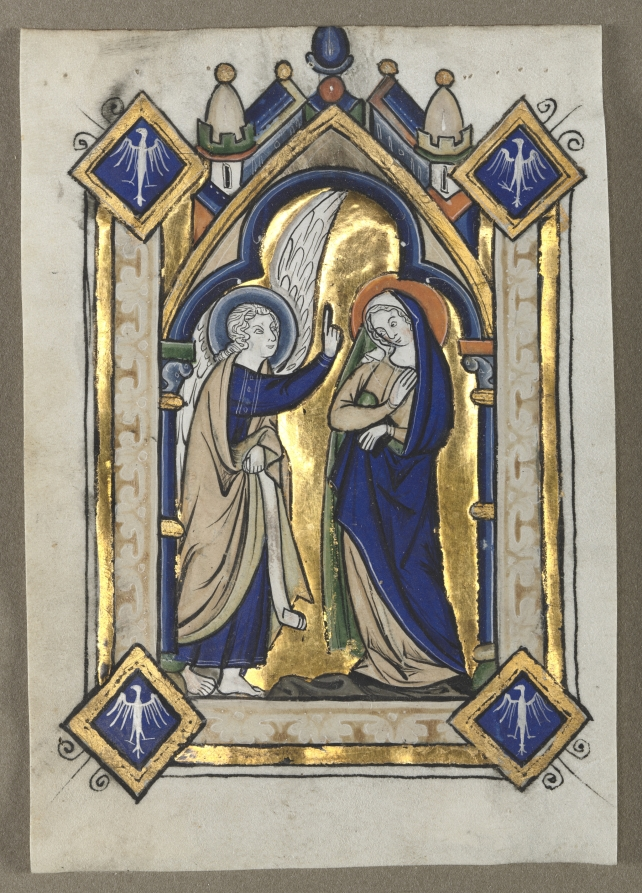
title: Leaf Excised from a Psalter: The Annunciation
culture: Flanders, Liège(?), 13th century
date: c. 1260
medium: tempera and burnished gold on vellum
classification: Manuscript